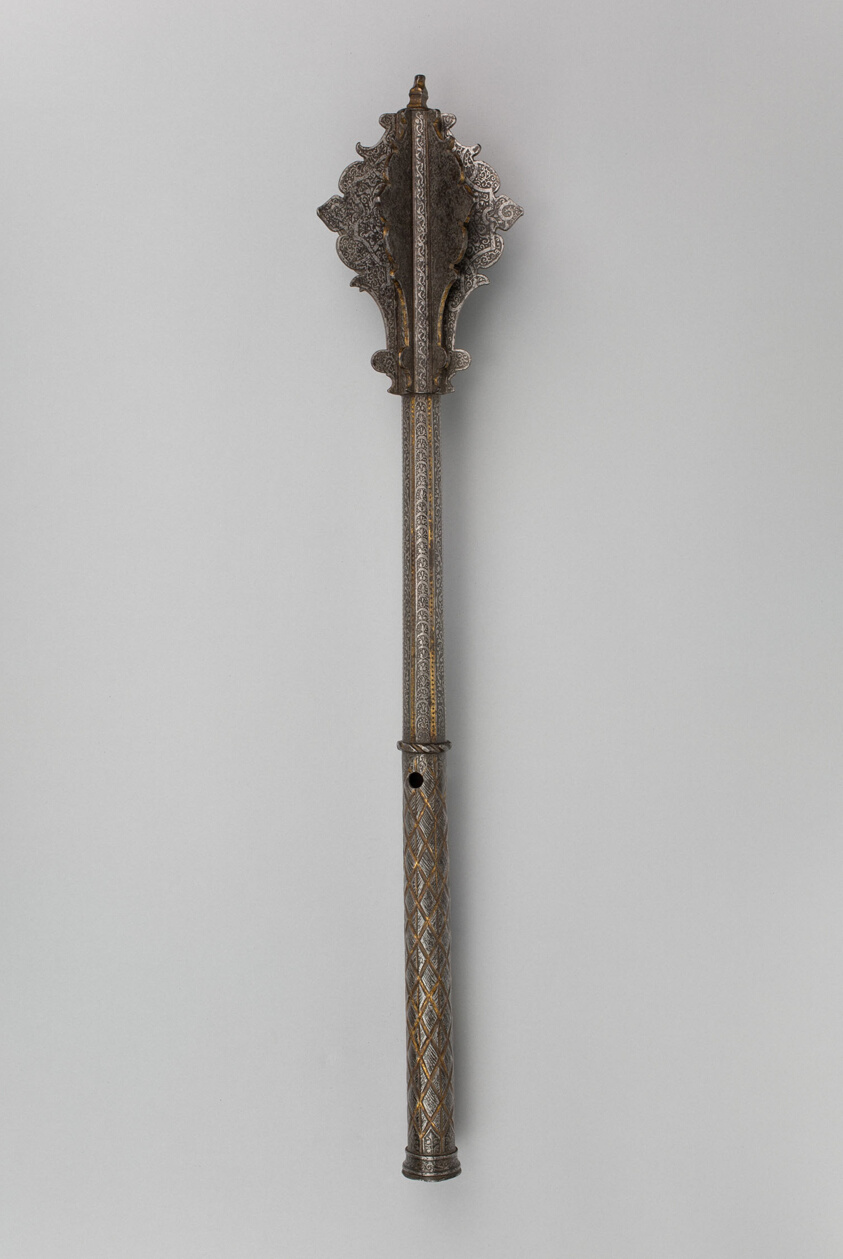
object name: Arms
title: Mace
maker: German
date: 1550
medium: Iron and gilding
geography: Germany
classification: shafted weapon; arms; arms and armor